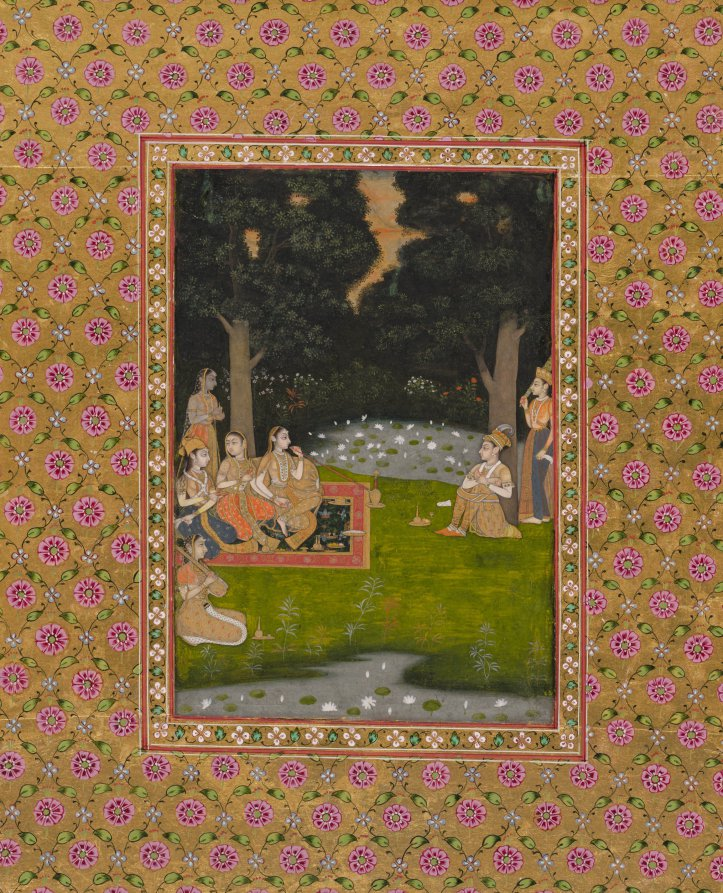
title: Princely ascetic in the forest visited by ladies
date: c. 1760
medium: Gum tempera and gold on paper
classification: Painting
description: At first glance a group of court women has gathered to visit a prince who abandoned the palace to practice yoga, as indicated by the strap around the knees of the figure seated at the right. Upon close inspection, however, the prince is being “played” by a woman dressed for the part. All the components of a pleasurable courtly Mughal gathering are present. A sumptuous carpet, bottles of alcohol, fruit, a hookah, breath-freshening paan, and a woman playing a vina have been set up in the forest as if in the palace.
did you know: Hennaed fingers and jeweled anklets confirm that this prince is a woman.